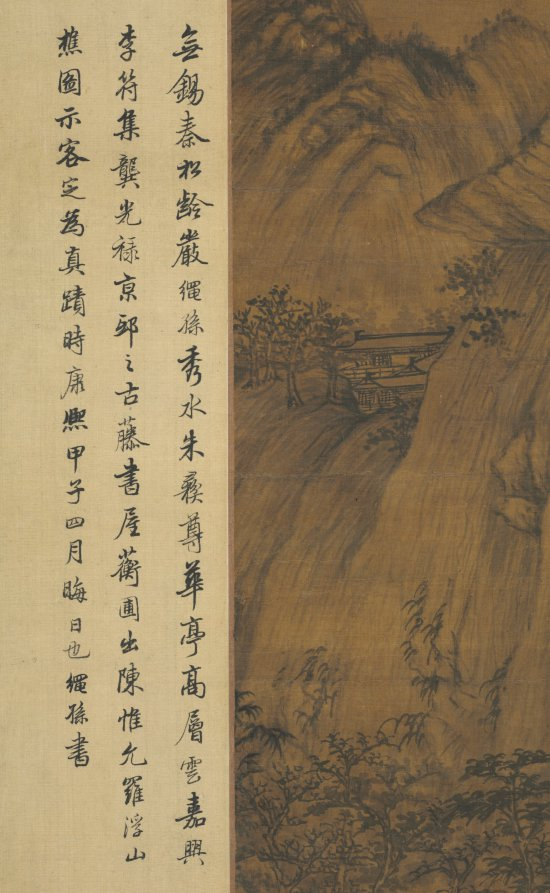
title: The Woodcutter of Luofu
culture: China, Yuan dynasty (1271-1368)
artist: Chen Ruyan (Chinese, c. 1331–1371)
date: 1366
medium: Hanging scroll; ink on silk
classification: Painting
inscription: 至正二十六年（1366）正月望後廬山汝言為思齊斷事寫羅浮山樵圖。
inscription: 2 colophons and 18 additional seals: 5 seals of Wang Shimin 王時敏 (1592–1680); 2 seals of Gong Xianglin 龔翔麟 (1658–1733); 1 colophon, dated 1684, of Yan Shengsun 嚴繩孫 (1623–1702); 1 colophon and 1 seal of Huang Ren (1683–1768); 2 seals of Lu Shusheng 陸樹聲 (3rd son of Lu Xinyuan 陸心源); 2 seals of T'ao Kuang; 1 seal of Tan Jing 譚敬 (20th c.); 3 seals of Zhang Heng 張珩 (1915–1963); 2 seals unidentified.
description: This landscape illustrates the traditionalism of Chinese painting: while the brush manner is novel, the composition is based on early Song dynasty (960-1127) models. The soft raveling brushstrokes and lumpy rock shapes are characteristic of the new 14th-century stylistic expression.